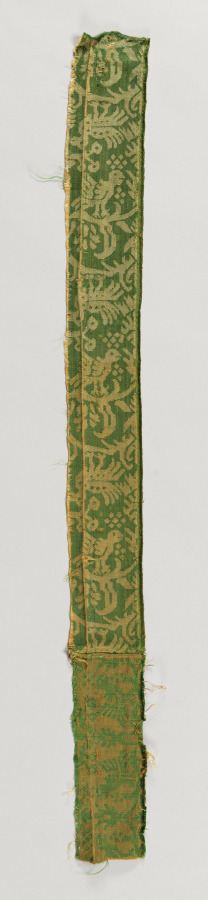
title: Fragment of Silk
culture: Spain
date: late 1600s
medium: silk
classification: Textile